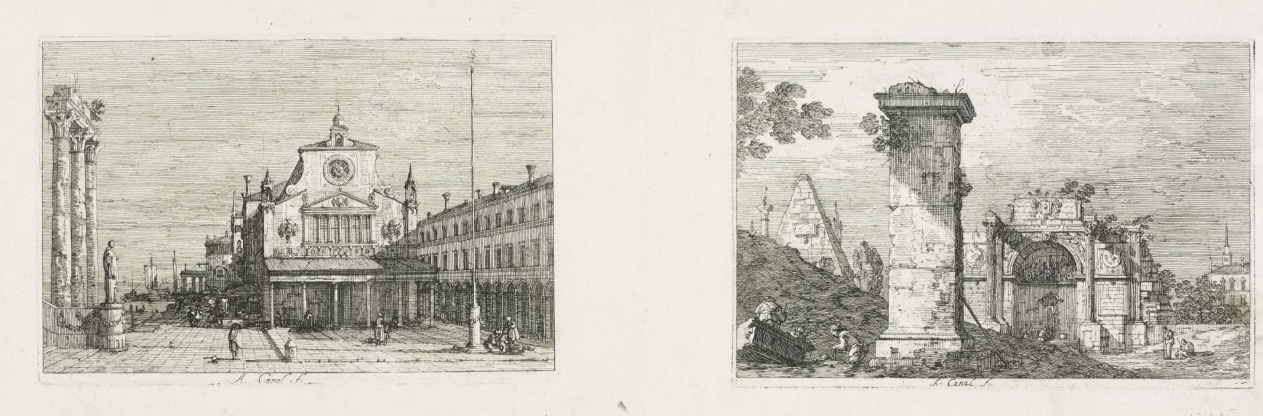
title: Views: Le Pilier isolè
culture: Italy, Venice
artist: Antonio Canaletto (Italian, 1697–1768)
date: 1735–1746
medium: etching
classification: Print